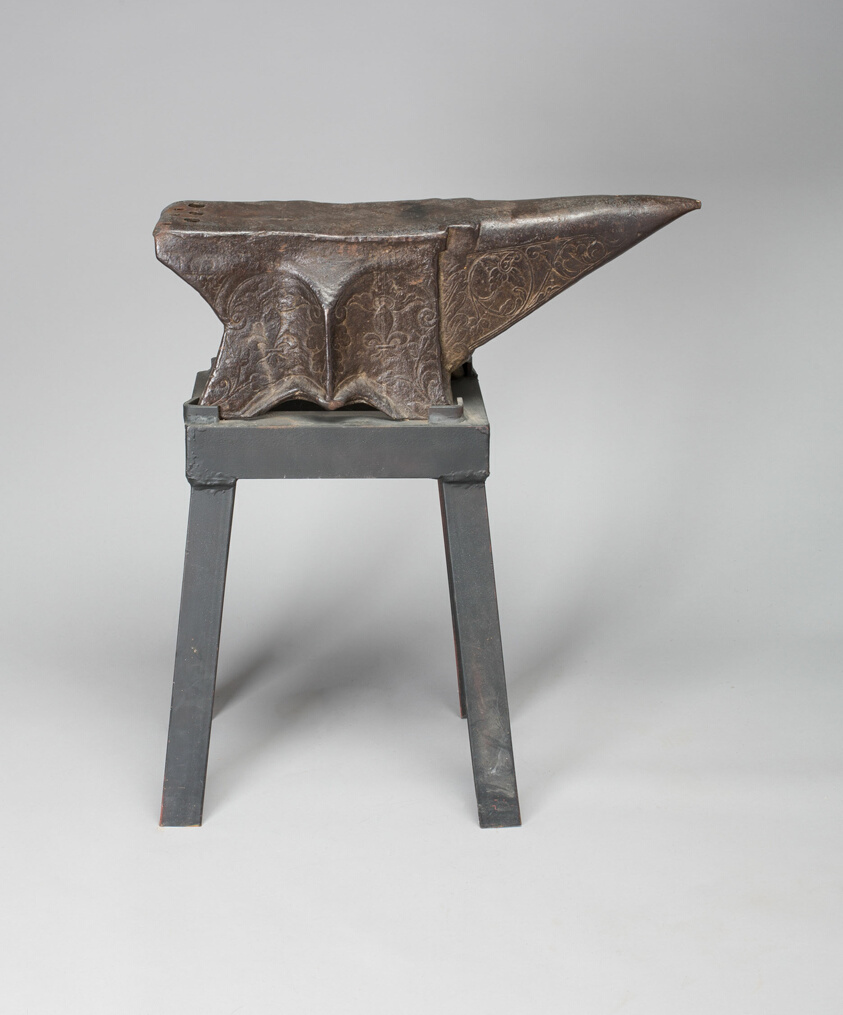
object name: Arms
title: Anvil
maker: European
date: 18th century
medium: Iron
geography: Europe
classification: arms and armor, miscellaneous; arms and armor; arms